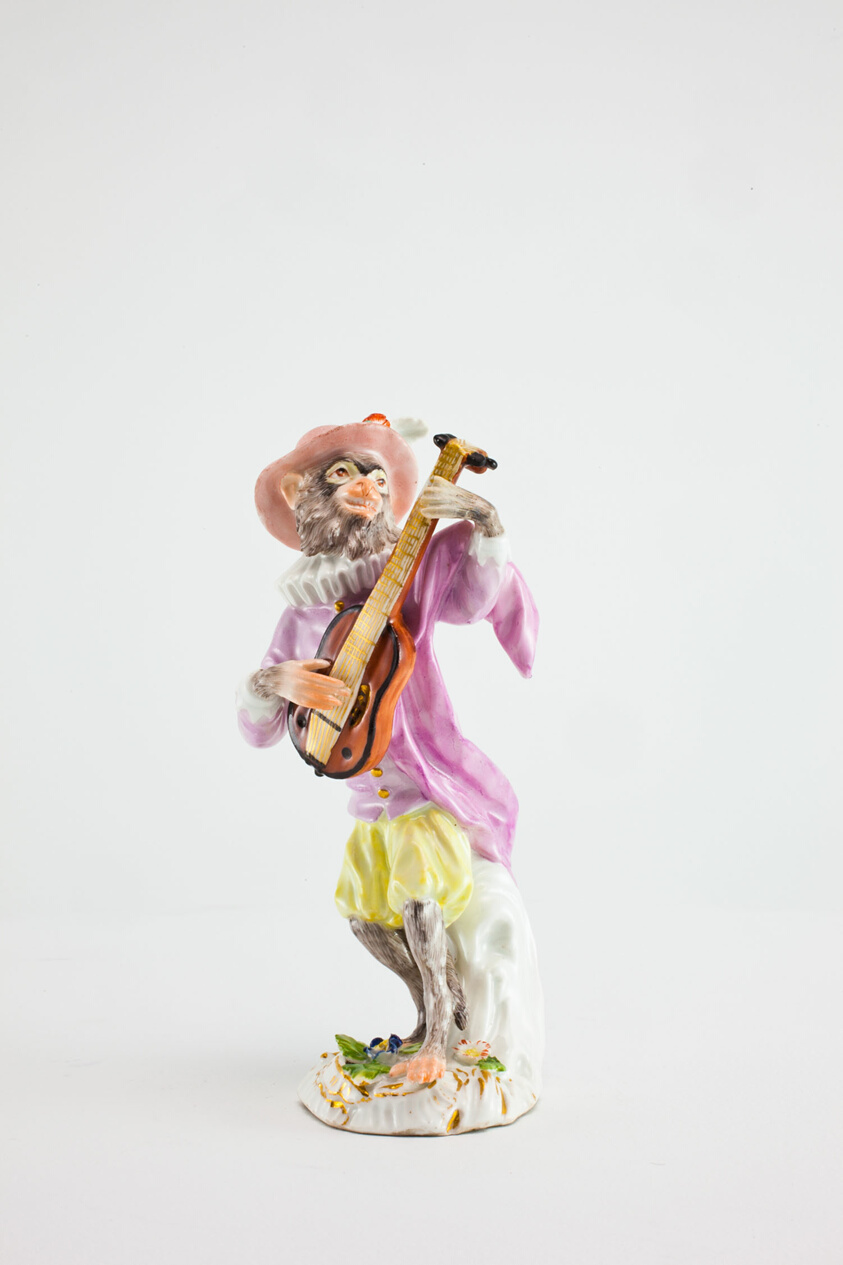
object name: Ceramics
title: Guitarist for the Monkey Band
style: Rococo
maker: Meissen Porcelain Manufactory; German, founded 1710; After a model of Kändler or Reinicke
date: c. 1765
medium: Hard-paste porcelain, polychrome enamels, and gilding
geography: Meissen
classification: sculpture; ceramics; porcelain; european decorative arts